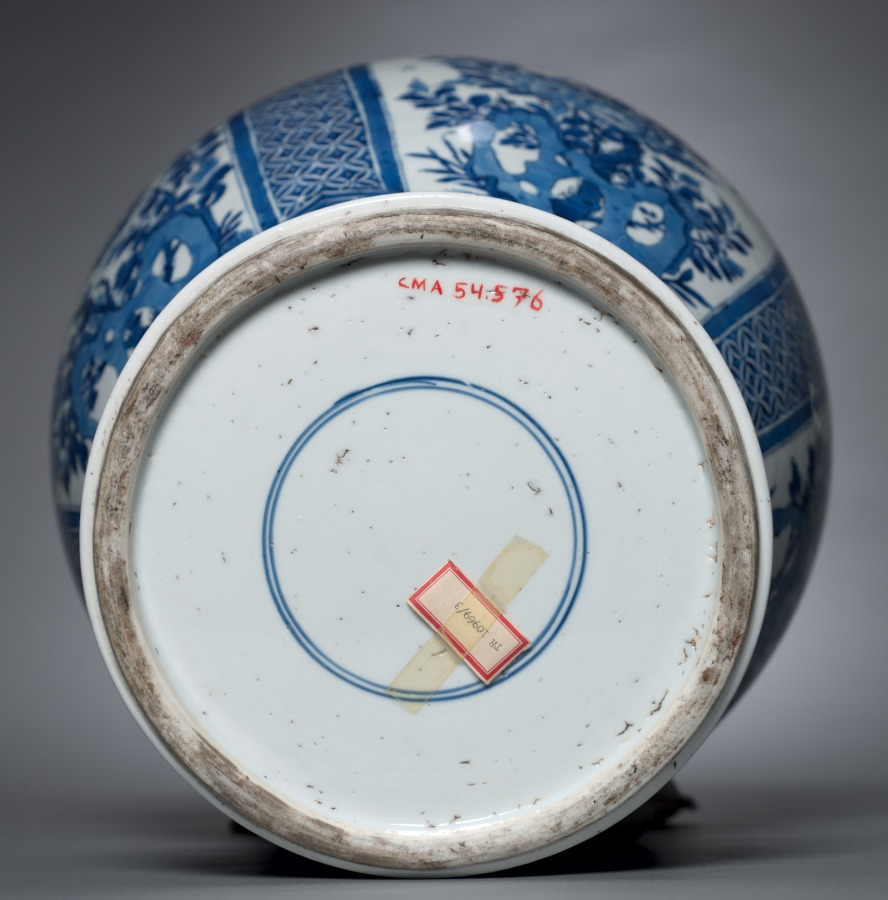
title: Vase with Cover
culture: China, Jiangxi province, Jingdezhen kilns, Qing dynasty (1644–1911), Kangxi reign (1662–1722)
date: 1662–1722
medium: porcelain with underglaze blue decoration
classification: Ceramic